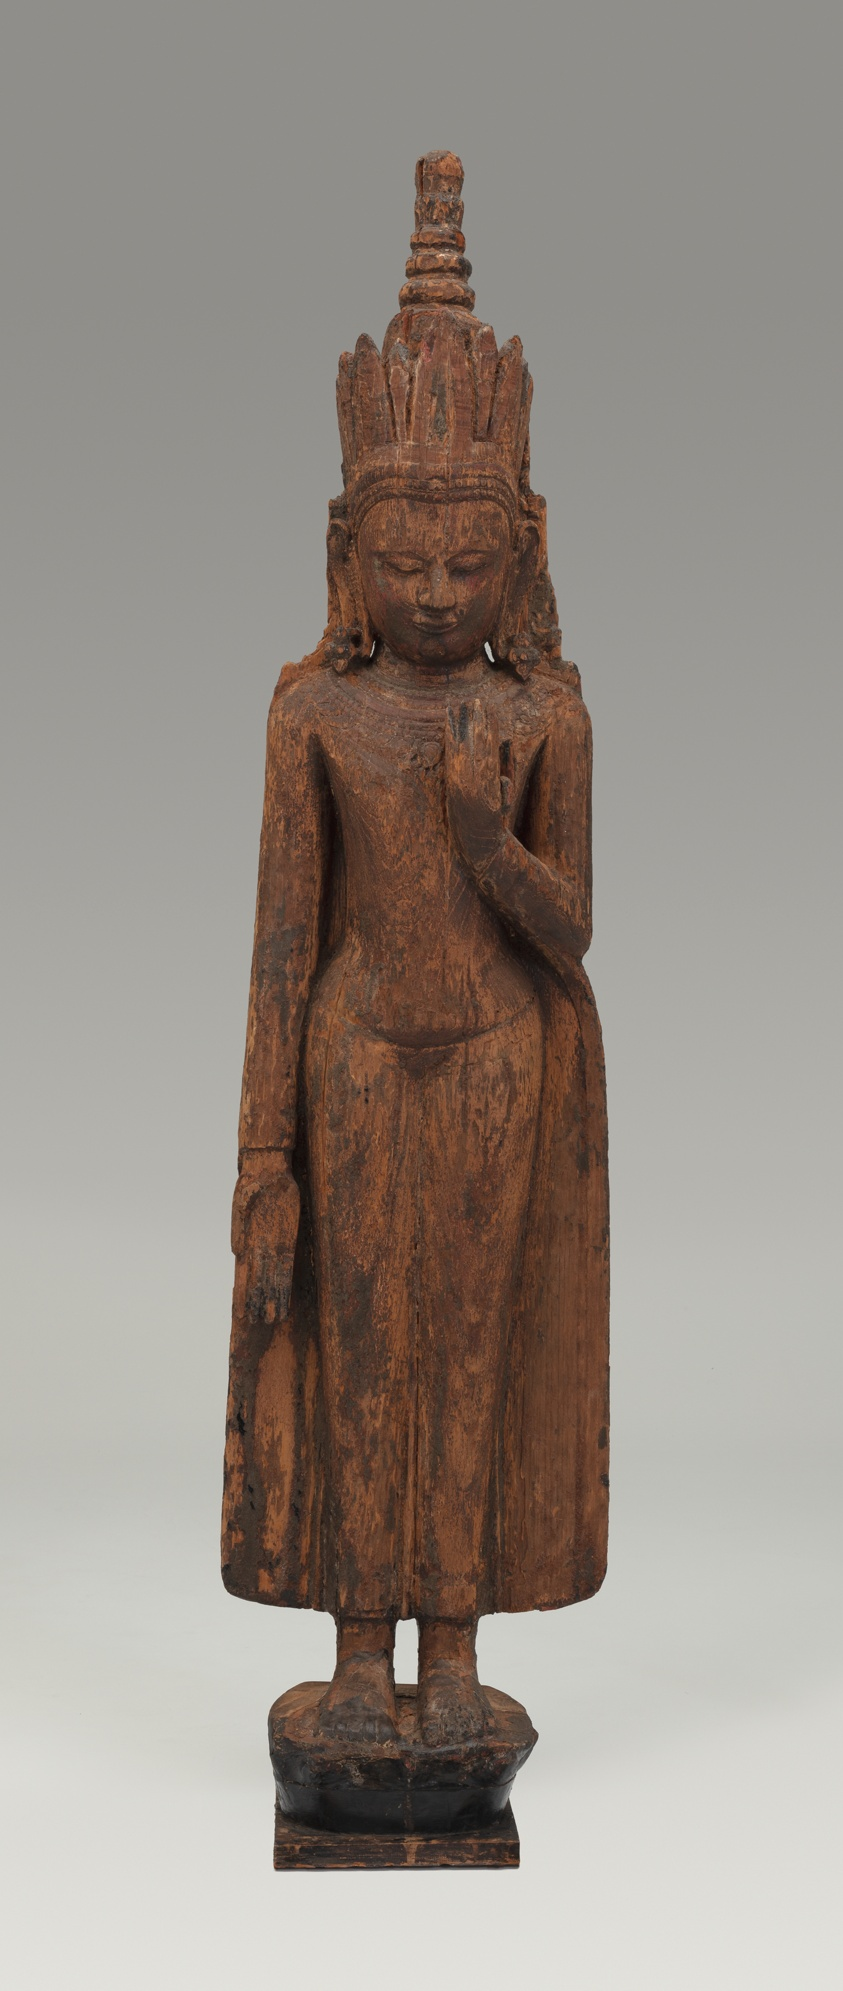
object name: Sculpture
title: Crowned and Bejewelled Buddha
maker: Burma (Myanmar)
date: Pagan period, late 12th/early 13th century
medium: Wood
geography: Myanmar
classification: wood; sculpture; asian art